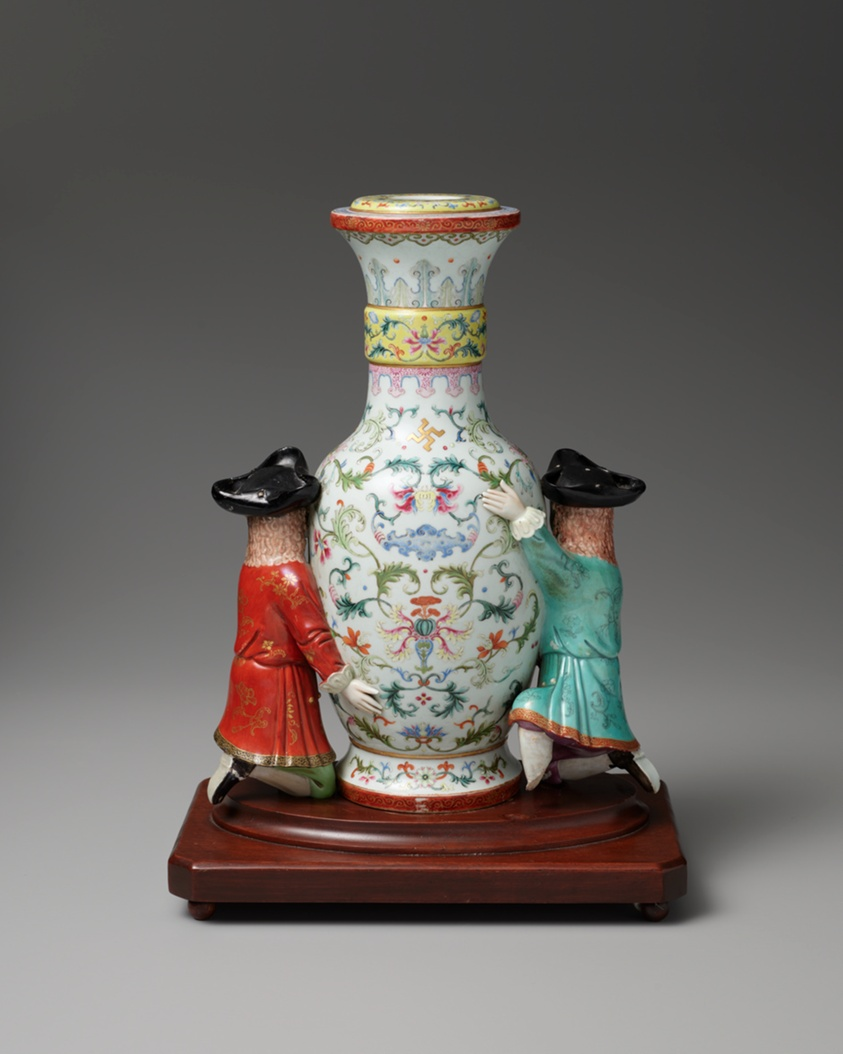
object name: Ceramics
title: Vase with European Figures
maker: China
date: second half of the 18th century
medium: Porcelain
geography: China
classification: vase; european decorative arts; porcelain